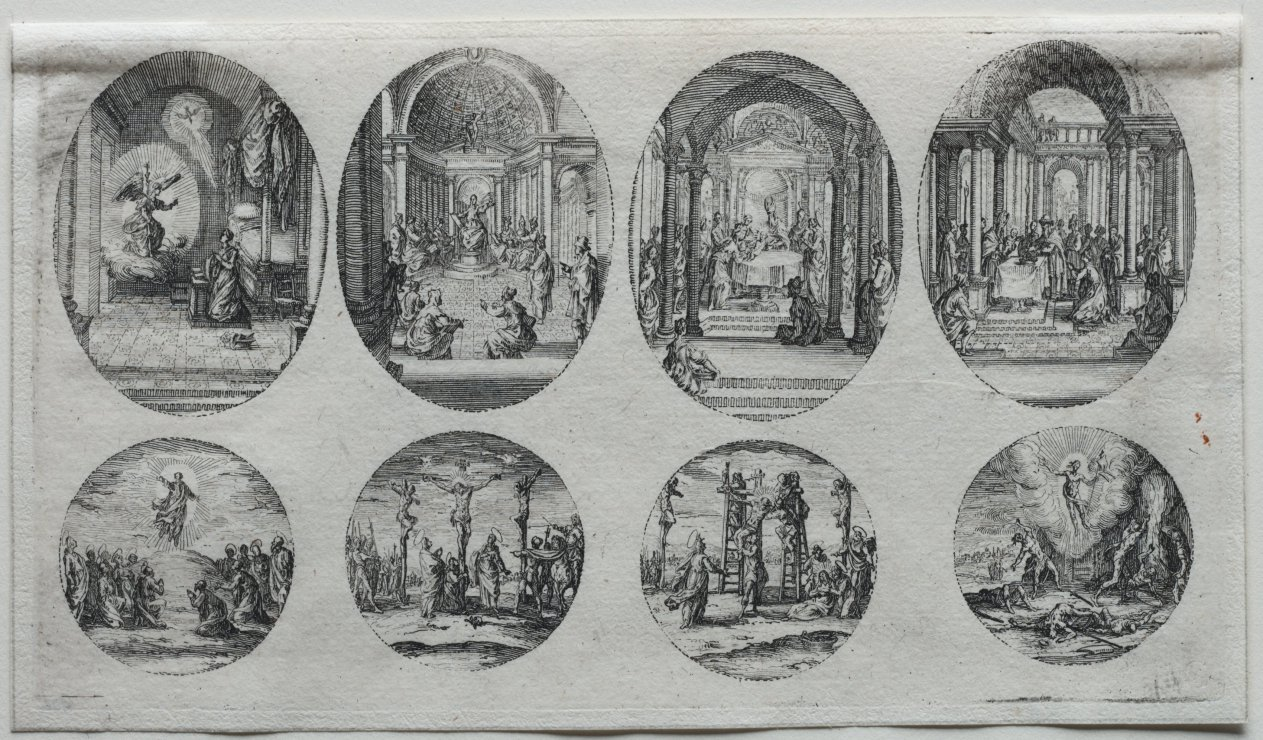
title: The Mysteries of the Passion: The Crucifixion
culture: France, 17th century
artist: Jacques Callot (French, 1592–1635)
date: 1631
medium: etching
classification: Print